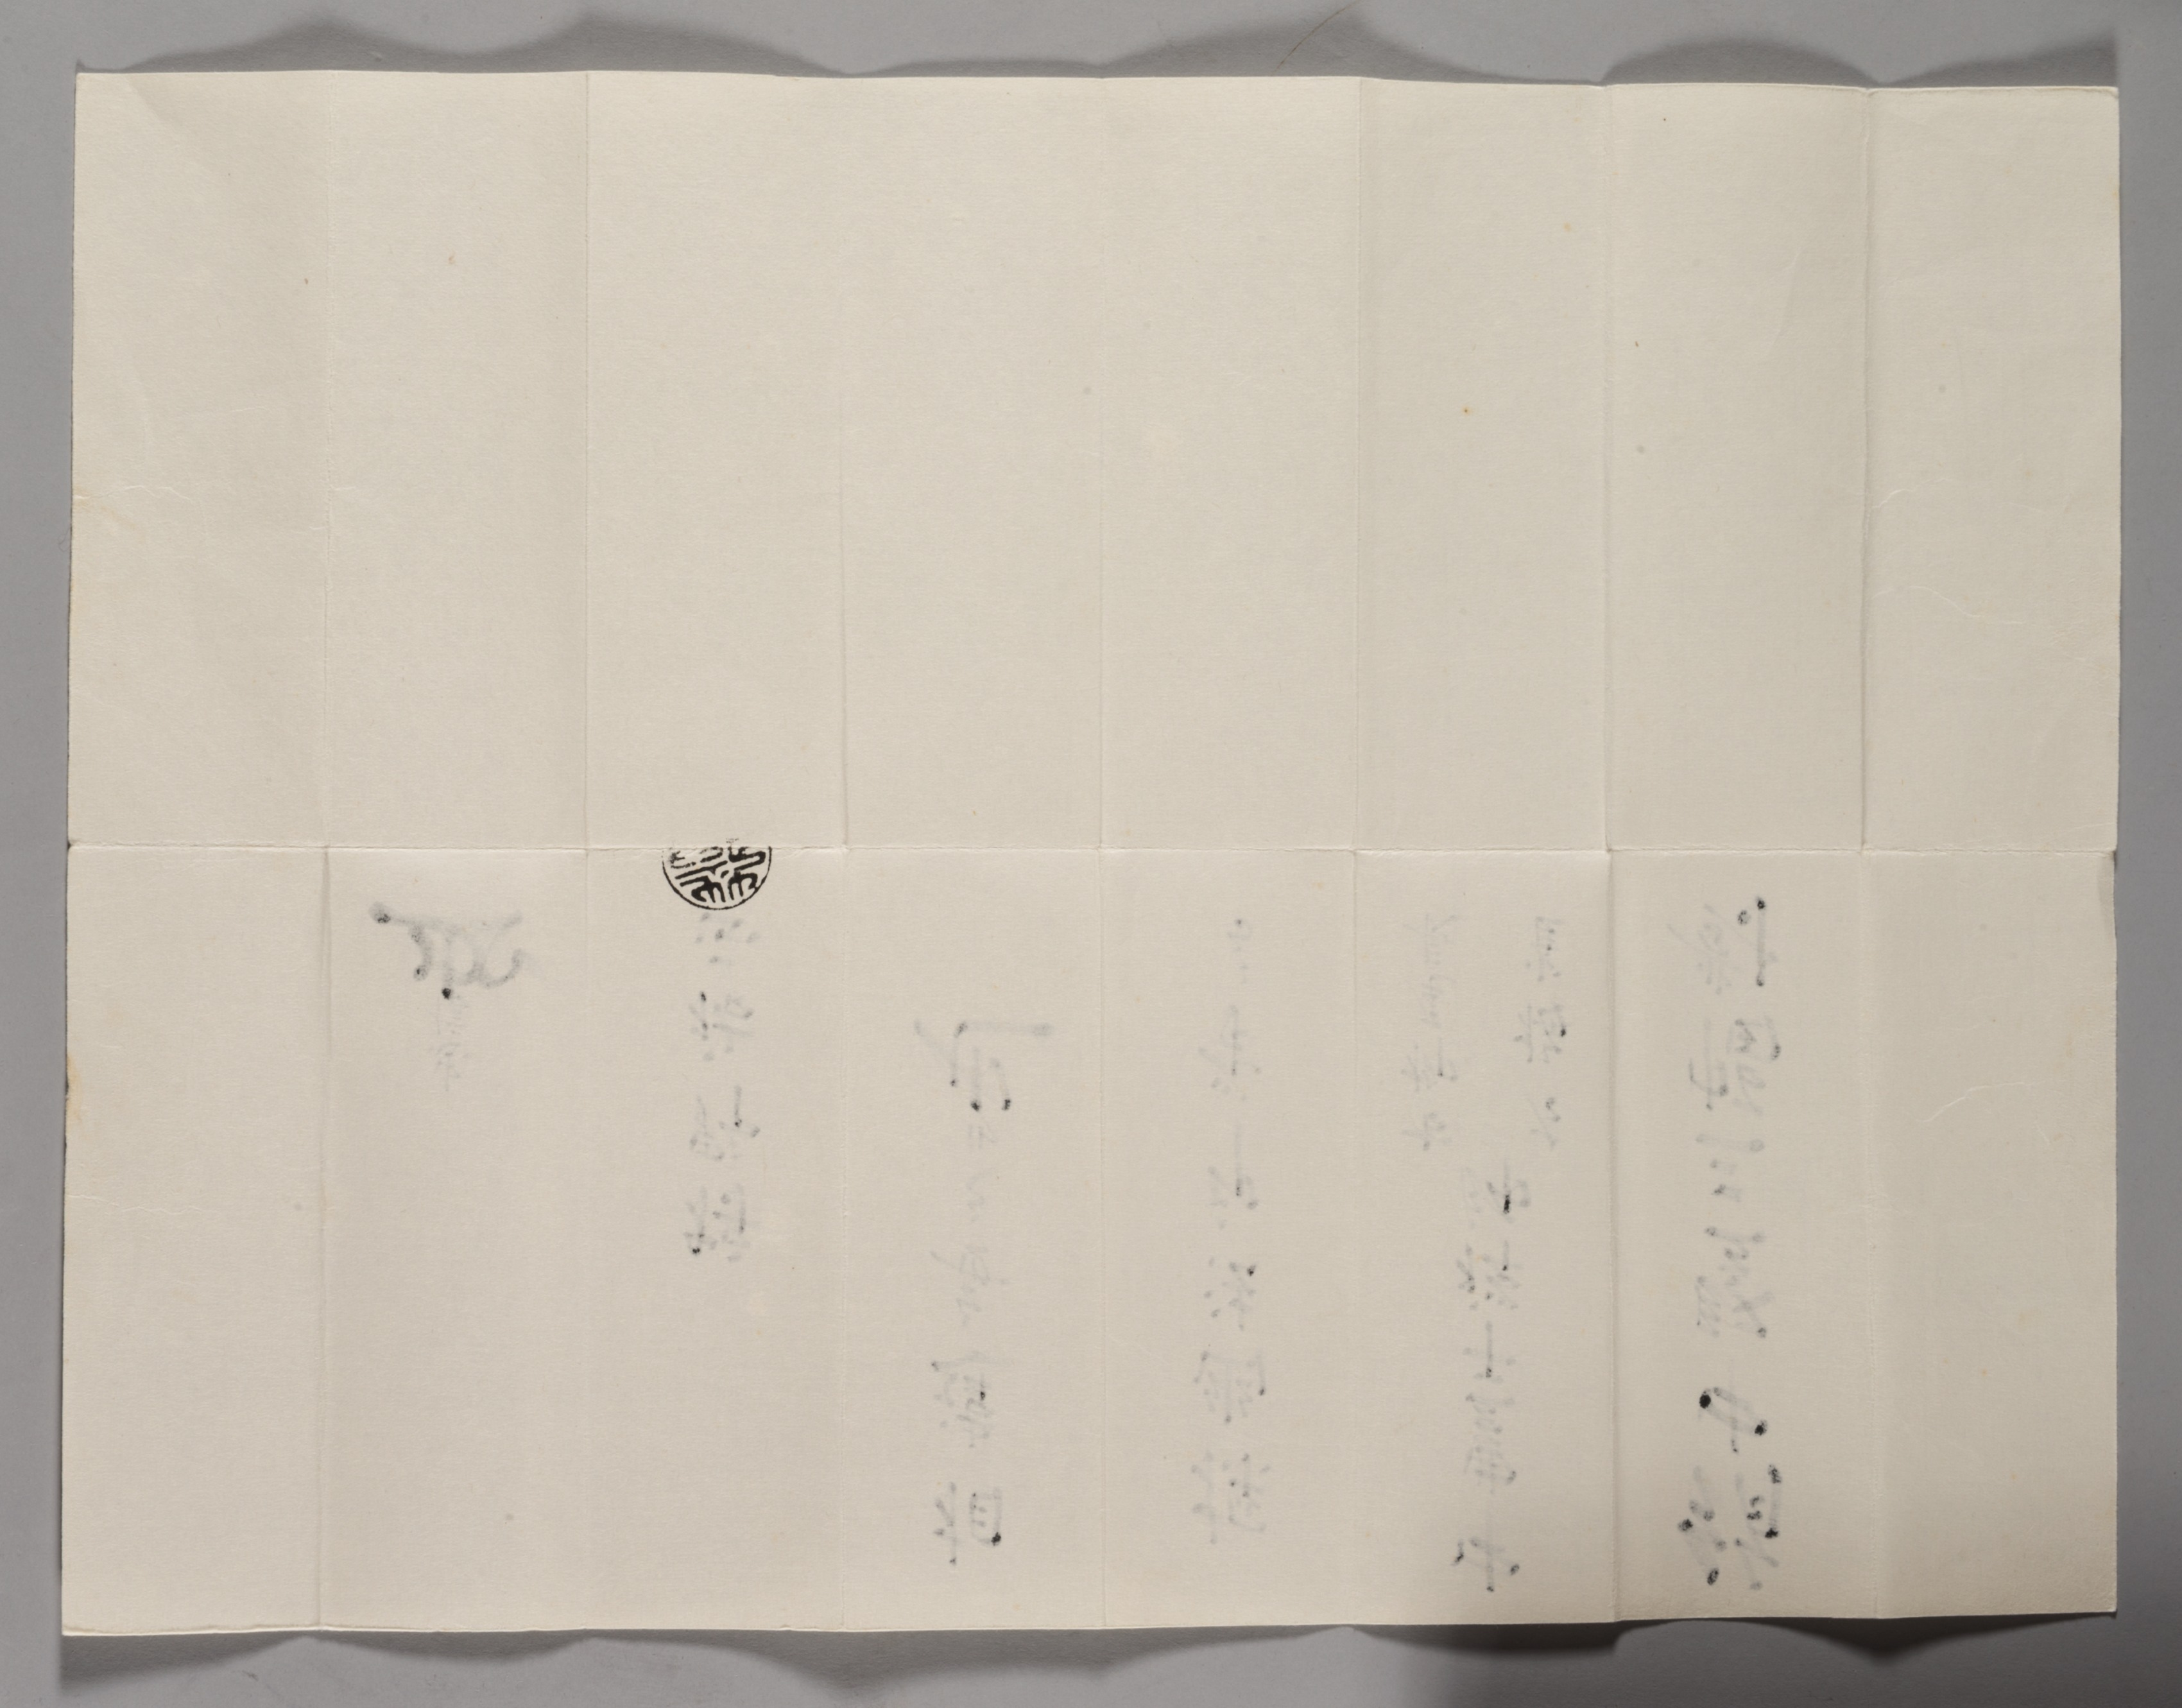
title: Sparrows on Blossoming Plum; A Sage with Tiger; Chinese Bird on Snow-Laden Branch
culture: Japan, Edo period (1615–1868)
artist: Kano Tan’yū (Japanese, 1602–1674)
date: 1661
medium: Triptych of hanging scrolls; ink and slight color on silk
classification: Painting